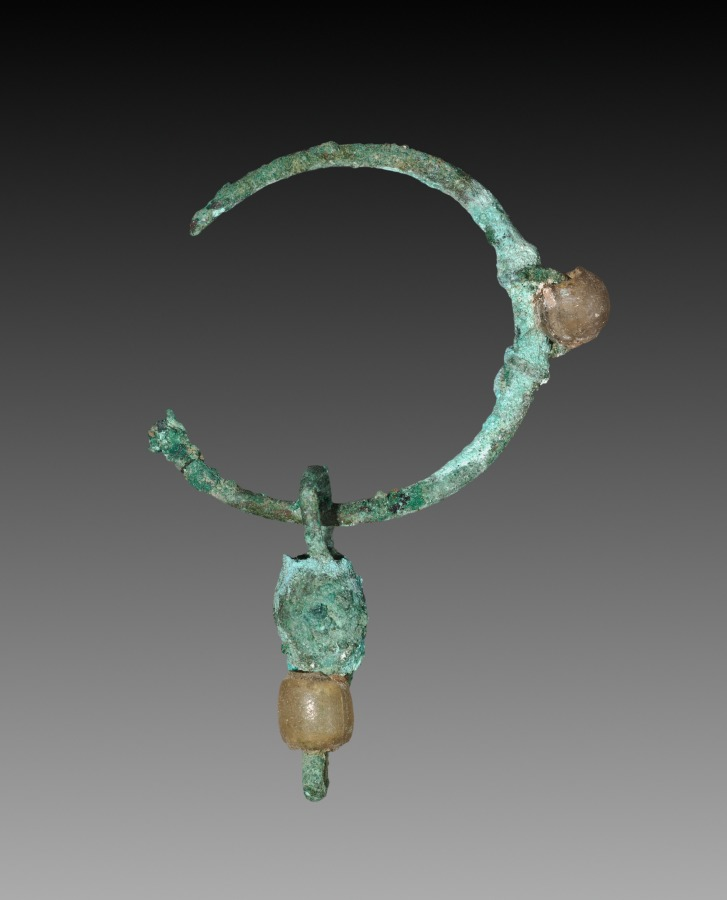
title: Pair of Earrings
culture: Egypt, Greco-Roman period (332 BCE–395 CE), Roman empire (30 BCE–395 CE)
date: 30 BCE–395 CE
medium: bronze and glass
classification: Jewelry